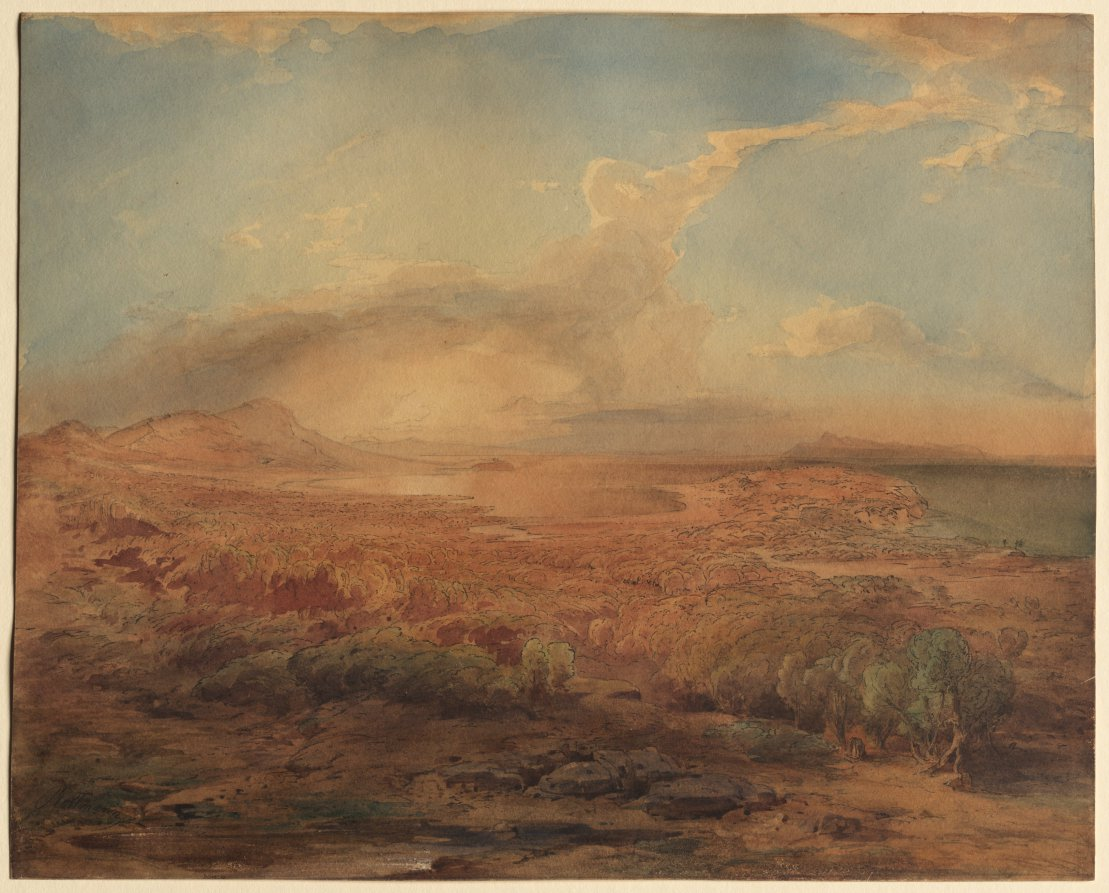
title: Epidauros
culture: Germany, 19th century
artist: Carl Rottmann (German, 1797–1850)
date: c. 1843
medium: pen and black ink and watercolor over graphite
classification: Drawing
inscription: signed, lower left, in black ink: Rottmann ; VERSO, lower left, in graphite: 585:493 [sideways] ; lower left, in graphite: N146.